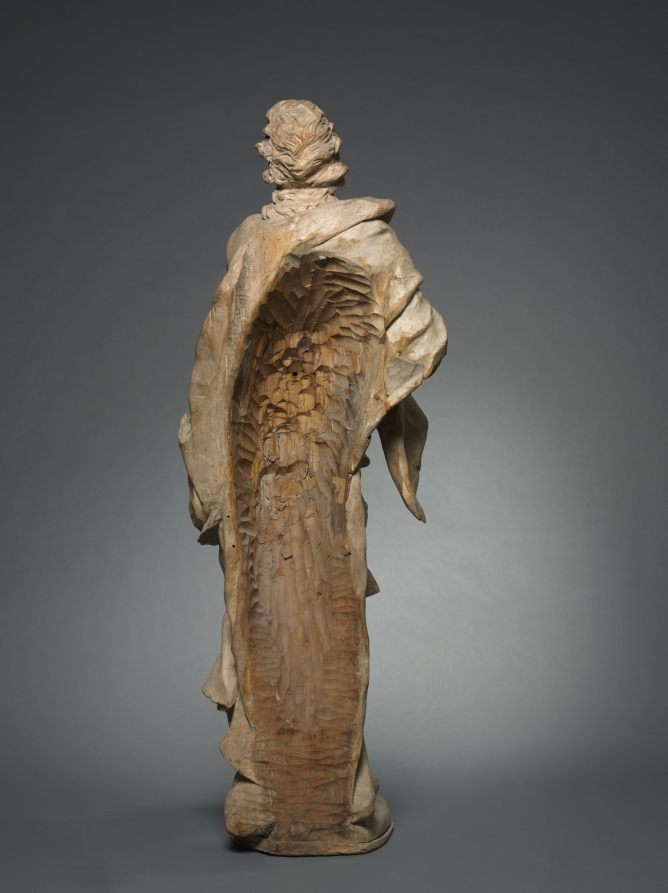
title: A Saint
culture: Germany or Austria, 18th century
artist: follower of Diego Francesco Carlone (Italian, 1674–1750)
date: c. 1730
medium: wood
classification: Sculpture